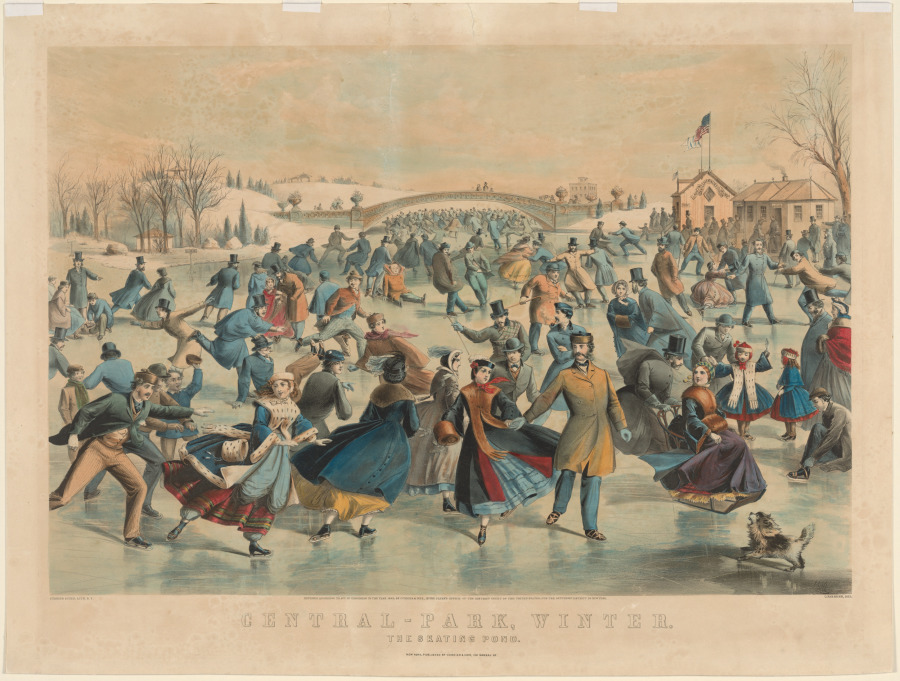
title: Central Park, Winter: The Skating Pond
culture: America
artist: Nathaniel Currier (American, 1813–1888)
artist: and James Merritt Ives (American, 1824–1895)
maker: after Charles Parsons (American, 1821–1910)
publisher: Currier & Ives (American, 1834–1907)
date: 1862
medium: lithograph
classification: Print